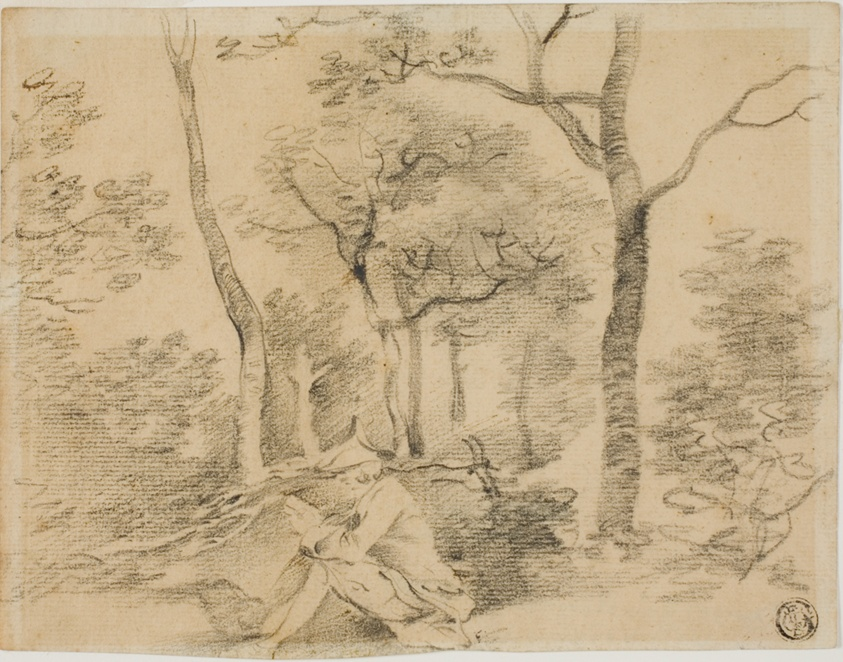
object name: Drawing and Watercolor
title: Gainsborough Sketching in Woods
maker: Attributed to Thomas Gainsborough; English, 1727-1788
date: c. 1747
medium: Black crayon on cream laid paper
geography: England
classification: crayon; drawings (visual works); prints and drawing